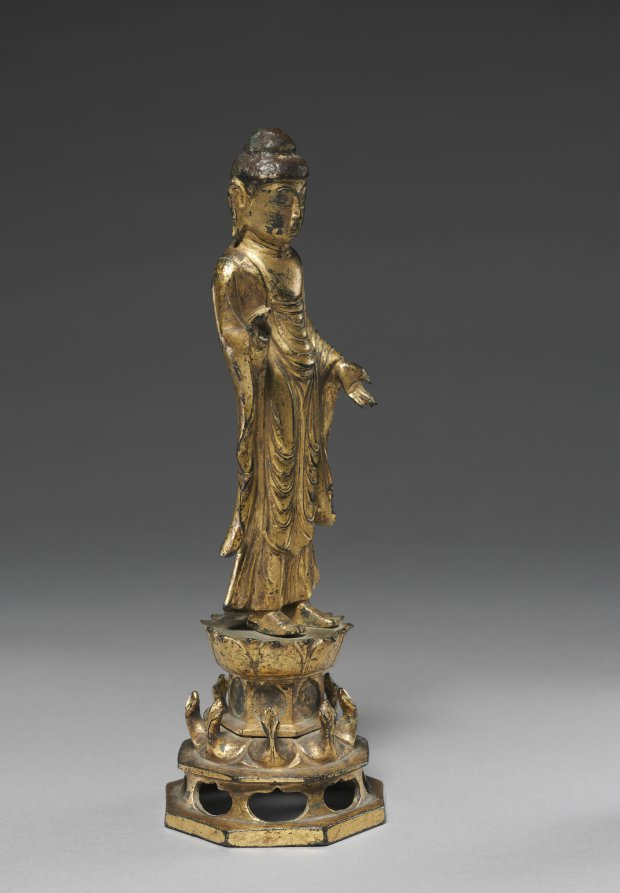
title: Statue of Amitabha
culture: Korea, Unified Silla period (676-935)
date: 800s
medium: gilt bronze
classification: Sculpture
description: This small sculpture shows Amitabha, the Buddha of the Western Paradise and the focus of the Pure Land sect of Buddhism, which was popular across East Asia, including Korea. This deity is recognizable from its right hand raised palm out in a gesture that reassures viewers to have no fear.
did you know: Small statues like this work were designed to be portable, rather than to be permanently housed in a Buddhist temple.